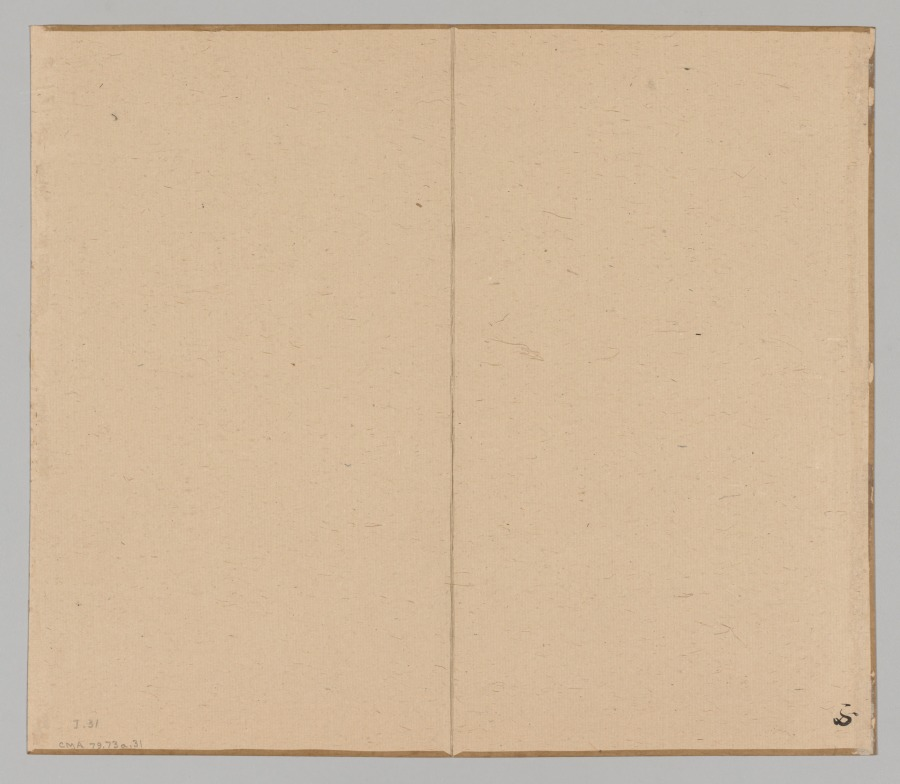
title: Reverberations of Taiga, Volume 1 (leaf 31)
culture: Japan, Edo period (1615–1868)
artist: Aoki Shukuya (Japanese, d. 1802)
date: mid- to late 1700s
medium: double-leaf from a pair of albums; ink and light color on paper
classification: Portfolio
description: Traditionally, young painters in Japan began their studies with an established master-painter. The master's compositions invariably became models that the apprentice copied to learn various ink and brush techniques. Shukuya was a pupil of the famous Kyoto artist Ikeno Taiga, whose style is reflected in these sketches of rocks, trees, and mountains.